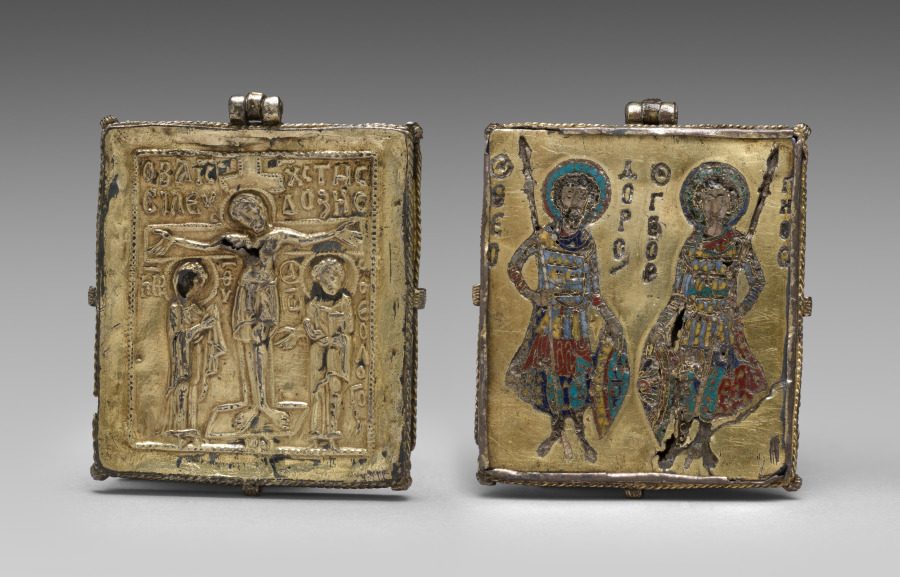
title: Enkolpion with the Crucifixion (front) and Saints Theodore and George (back)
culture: Byzantium, Constantinople, Byzantine period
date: 1080–1120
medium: silver gilt and cloisoné enamel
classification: Metalwork